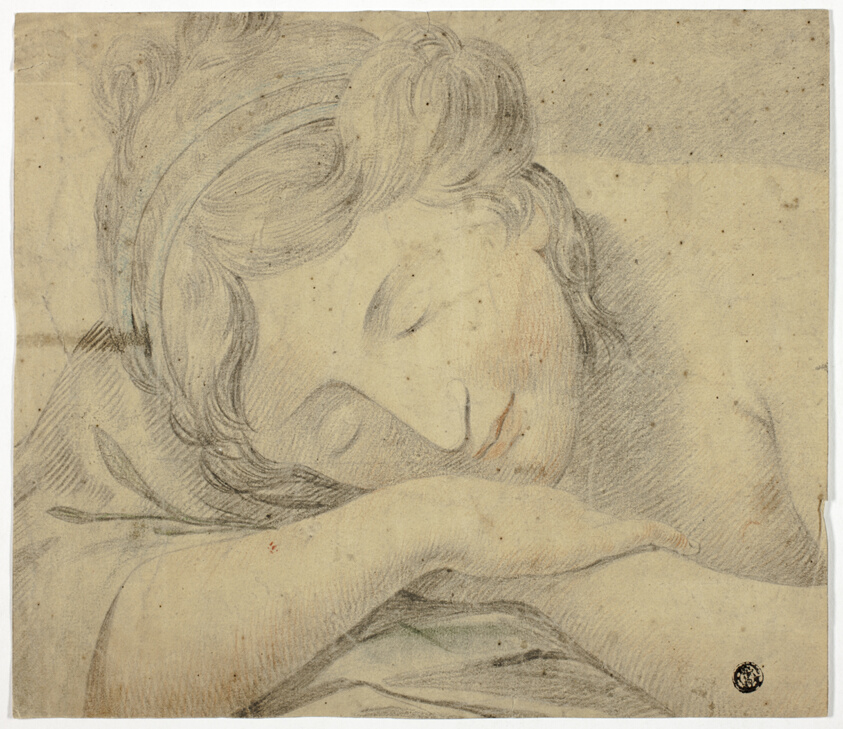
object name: Drawing and Watercolor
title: Sleeping Woman With Head on Arms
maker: Unknown artist; possibly German, 18th century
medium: Charcoal, with red and green and blue chalk, on tan wove paper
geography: Germany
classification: chalk; drawings (visual works); prints and drawing